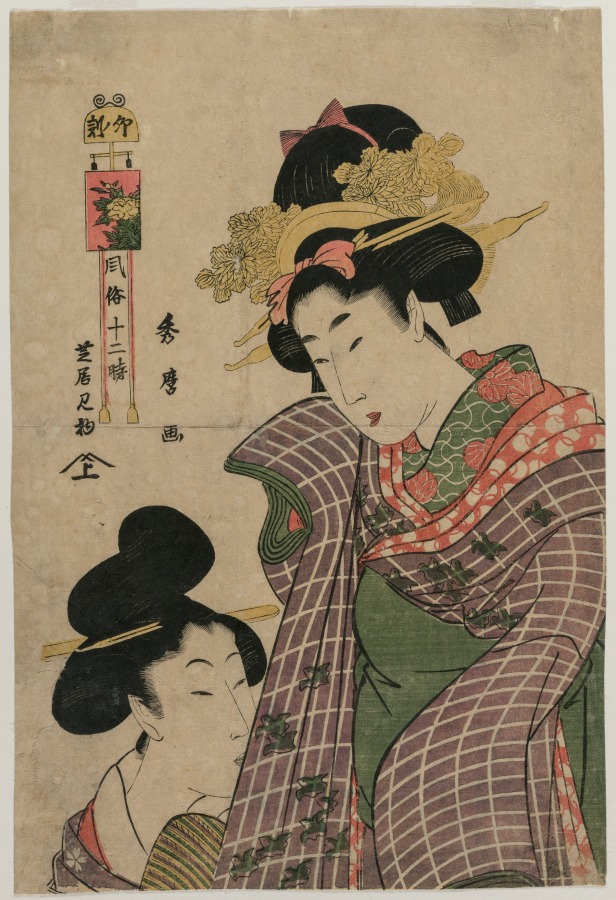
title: Going to the Kabuki Theater in the Hour of the Hare (From the Series The Twelve Hours with Daily Events)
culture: Japan, Edo period (1615–1868)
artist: Kitagawa Hidemaro (Japanese)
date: early 1800s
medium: color woodblock print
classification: Print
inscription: Signature: Hidemaro ga